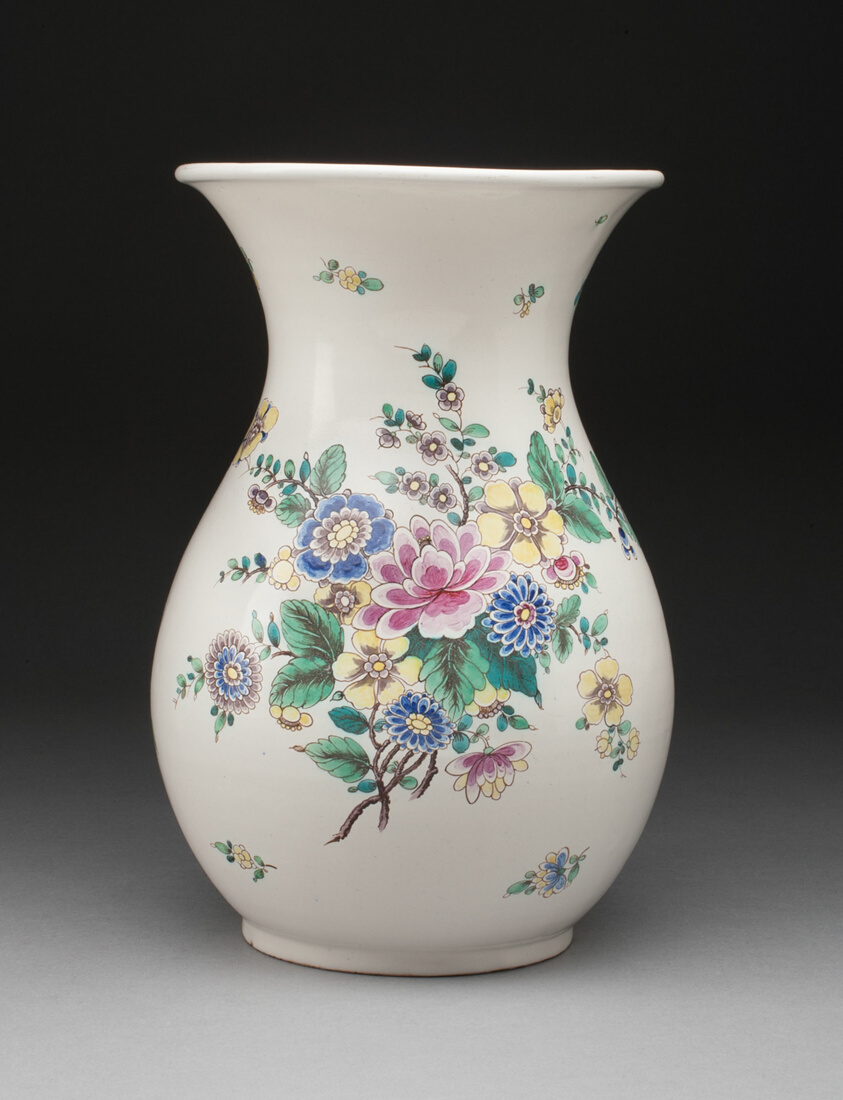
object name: Ceramics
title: Vase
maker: Germany, Ludwigsburg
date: c. 1775/1800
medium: Tin-glazed earthenware (faience) with polychrome enamel decoration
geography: Ludwigsburg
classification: vase; earthenware; vessel; european decorative arts; ceramics